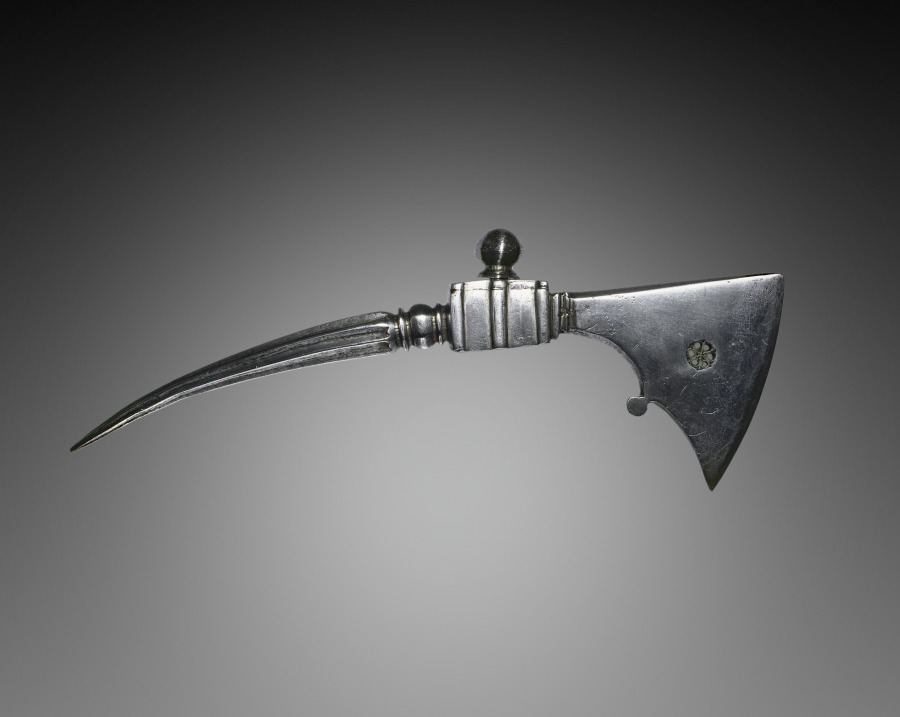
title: Battle Axe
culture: Italy, late 16th Century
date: late 1500s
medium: steel, inset with copper rosette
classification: Arms and Armor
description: The axe has been a favorite weapon in Europe for as long as armor has been worn. Although it was useful as a simple tool for chopping, battle axes could become a way of expressing personal style. They could be decorated and embellished without impeding their function. Inset into this axe head is a copper rosette.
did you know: The haft or wooden handle of this axe is missing.